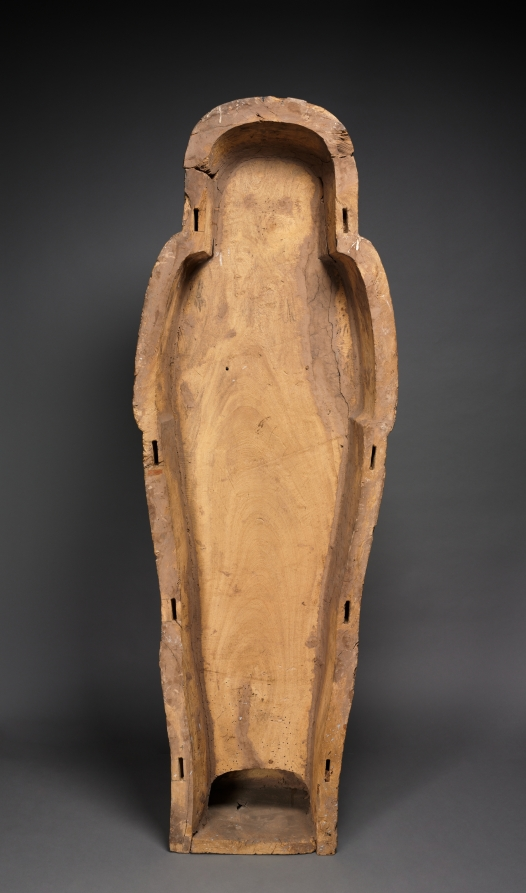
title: Coffin of Nesykhonsu (lid)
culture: Egypt, Third Intermediate (1069–715 BCE), Dynasties 21–22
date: c. 976–889 BCE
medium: gessoed and painted sycamore fig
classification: Funerary Equipment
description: A complete set of coffins during the late New Kingdom and Third Intermediate Period consisted of an outer and inner coffin and a mummy board (essentially a lid without a case, placed directly over the wrapped mummy). Judging by its size, this must have been Nesykhonsu's outer coffin. The type is essentially the same as the coffin of Bakenmut, which was also an outer coffin. The two coffins are said to have been found together and to have belonged to a man and wife. This is quite possible, although the inscriptions do not bear it out. Bakenmut is not mentioned on Nesykhonsu's coffin, nor is she mentioned on his. There was by this time a tremendous repertoire of scenes appropriate for coffin decoration. Whereas Bakenmut's coffin features images of deified dead pharaohs, Nesykhonsu's is decorated in a more personal way with scenes from her own funeral. The main scene in the interior (near the top) shows a priest clad in a panther skin with the mummy of Nesykhonsu behind. The god appears in mummy form and wears a sun disk on his head. The scarab beetle inside the sun disk identifies him as Khepri, the morning sun, and the hieroglyphs to the right identify him as Atum, the evening sun. Taken together, image and text represent the sun god in both his rising and setting, youthful and aged aspects.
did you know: Two of Nesykhonsu's titles, "Lady of the House" and "Singer of the Choir of Mut the Great," are written on the outside of the coffin.